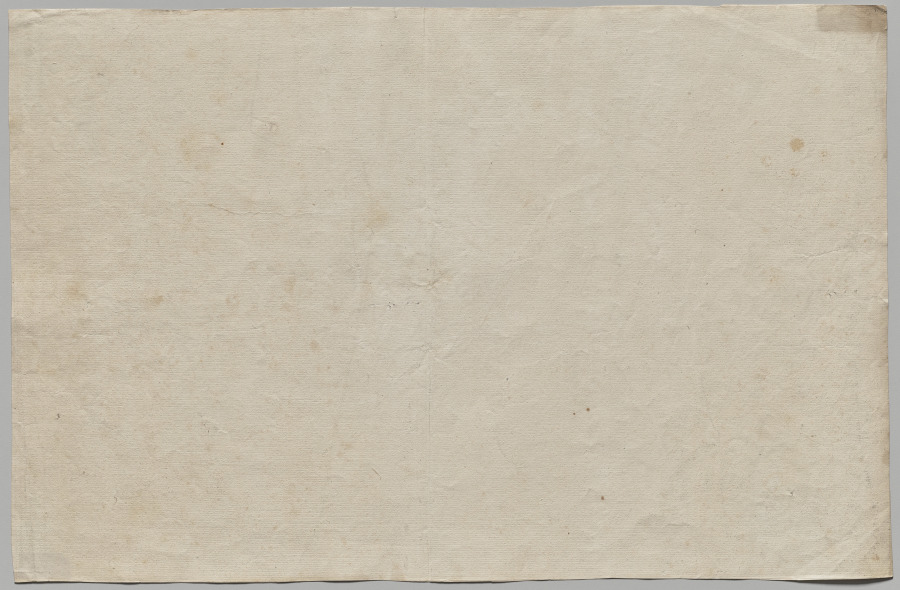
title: Nuova pianta di Roma data in luce da Giambattista Nolli l’anno MDCCXLVII, known as La Pianta Grande di Roma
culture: Italy, 18th century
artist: Giovanni Battista Nolli (Italian, 1701–1756)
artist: Carlo Nolli (Italian, 1690–1790)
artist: Rocco Pozzi (Italian, 1701–1774)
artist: Pietro Campana de Soriano (Italian, 1725–c. 1779)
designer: Stefano Pozzi (Italian, 1699–1768)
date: 1748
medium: etching and engraving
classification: Print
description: The monumental Pianta Grande di Roma, or Large Plan of Rome, which measures about 5 x 7 feet when its twelve plates are assembled, is a landmark in both cartography and printmaking. The map is considered the first scientific rendering of Rome, establishing new standards of accuracy and thoroughness when it was published in 1748. Devised by the Lombard architect and surveyor Giovanni Battista Nolli (Italian, 1701-56), the creation of the map required over ten years of surveying the city carried out by Nolli and a team of assistants with the help of new measuring devices. In Nolli’s “ichnographic” (also called “ground”) plan, architectural features and the urban infrastructure are reduced to a single horizontal slice, a minutely detailed footprint that conveys dimensions, proportions, and orientations to scale with the utmost clarity.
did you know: To make this map, Pope Clement XII granted the mapmaker permission to measure courtyards and other interior, inaccessible spaces in monastic communities, even those in nuns’ convents, which was controversial at the time.